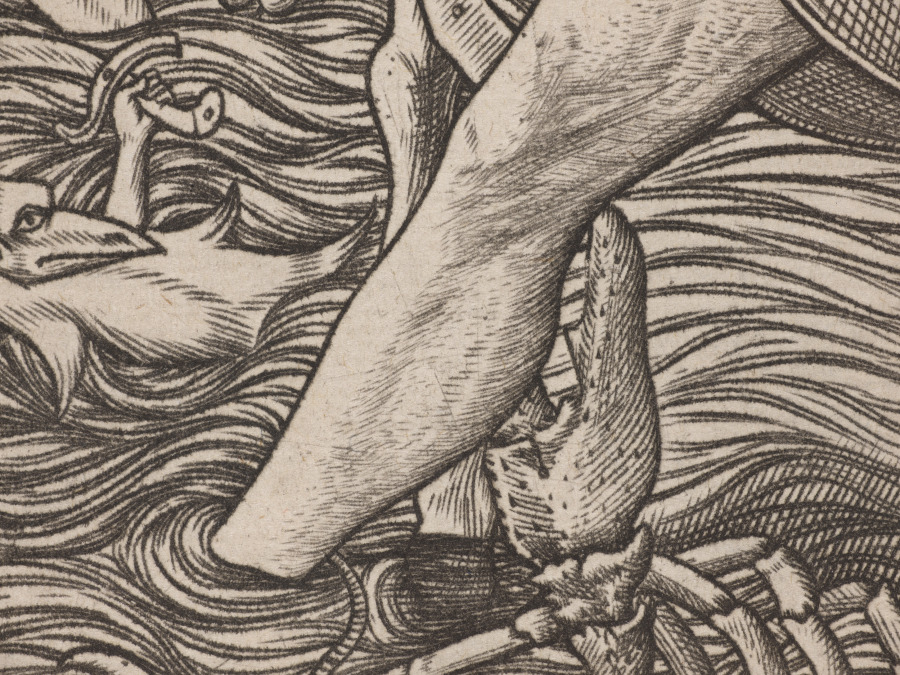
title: St. Christopher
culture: Netherlands, 15th century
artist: Alart du Hameel (Netherlandish, c. 1449–c.1507)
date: 1478–1506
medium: engraving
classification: Print